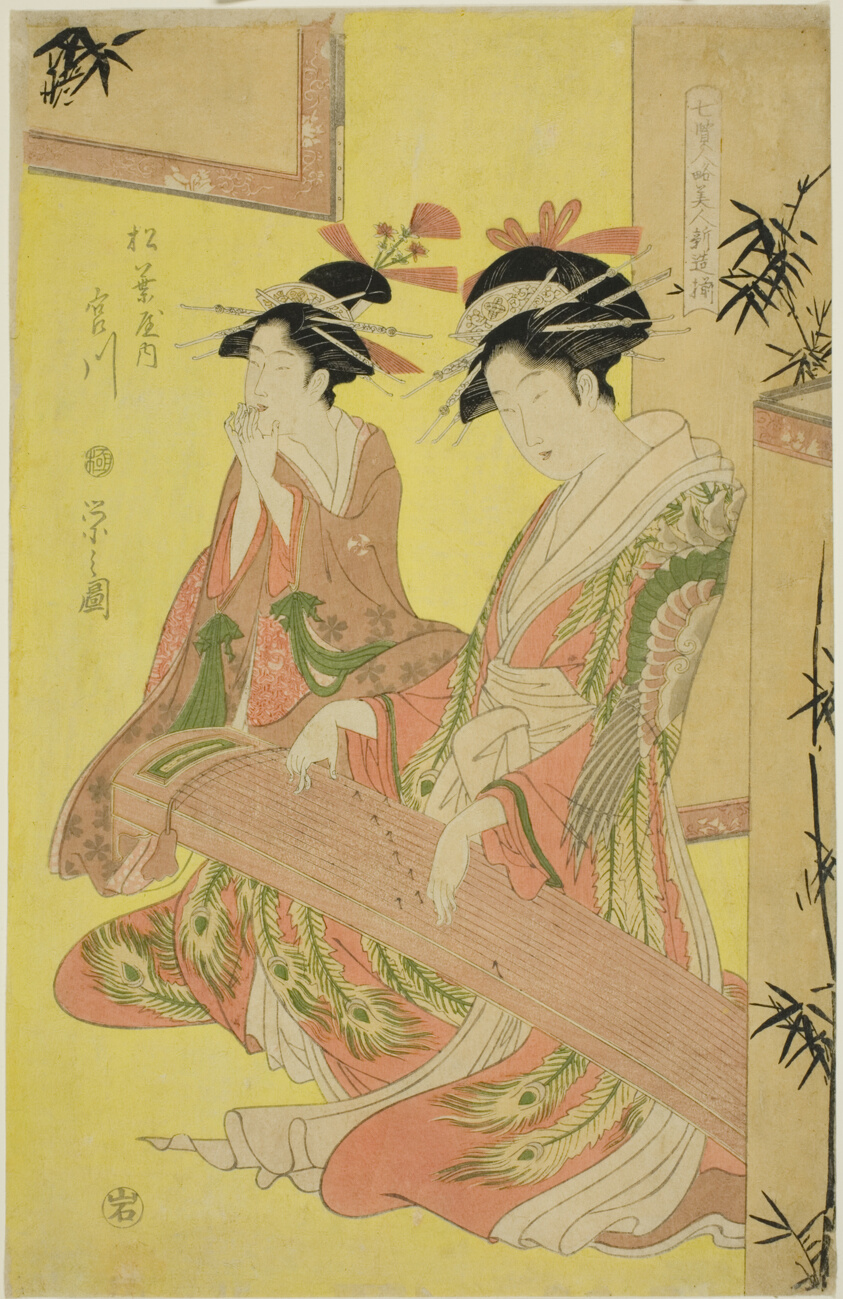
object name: Print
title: Beauties Parodying the Seven Sages - A Selection of Younger Courtesans (Shichi kenjin yatsushi bijin shinzo zoroe): Miyagawa of the Matsubaya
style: Japanese (culture or style)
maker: Chobunsai Eishi; Japanese, 1756-1829; Publisher: Iwato-Ya; Japanese, Unknown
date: c. 1793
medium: Color woodblock print; oban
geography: Japan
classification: woodblock print; print; asian art